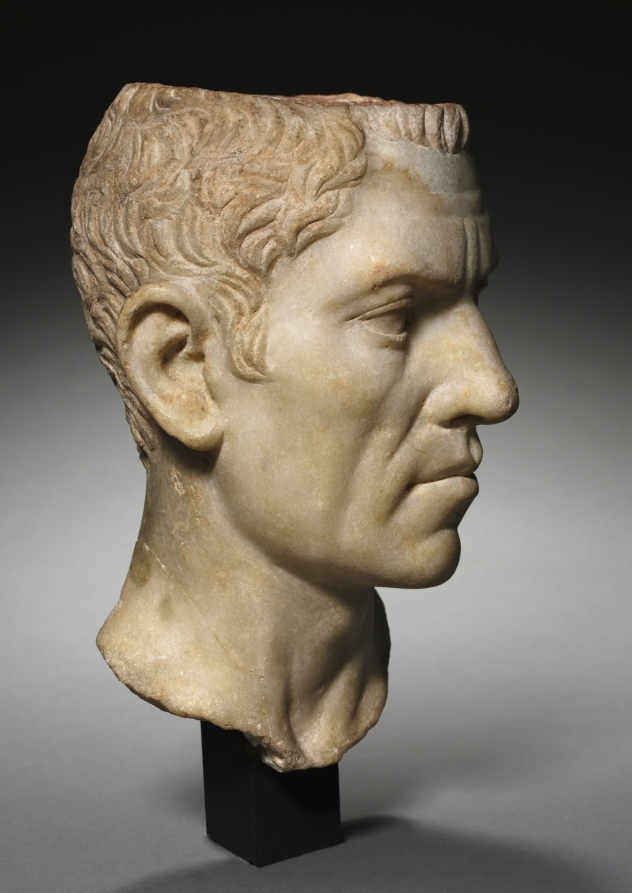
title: Portrait Head of C. Cornelius Gallus (?)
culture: Egypt, Greco-Roman period (332 BCE–395 CE), Roman empire (30 BCE–395 CE)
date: c. 30 BCE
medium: marble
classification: Sculpture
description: This highly individual portrait must have been made for a man of considerable importance. It may represent Gaius Cornelius Gallus, who lived c. 69-26 BC. After aiding Octavian in the war against Antony and Cleopatra, Gallus served as the first governor of Egypt. There he put down two rebellions, but soon fell into disgrace and exile, eventually committing suicide. The head was made to be inserted into a body, and has a flat back and top, suggesting it once wore a separately made fold of toga draped over it (in the fashion known as togatus capite velato, associated with high priests). Some scholars have suggested a later date for this portrait, perhaps in the reign of Nero or Claudius.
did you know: Traces of red paint remain, especially in the hair.